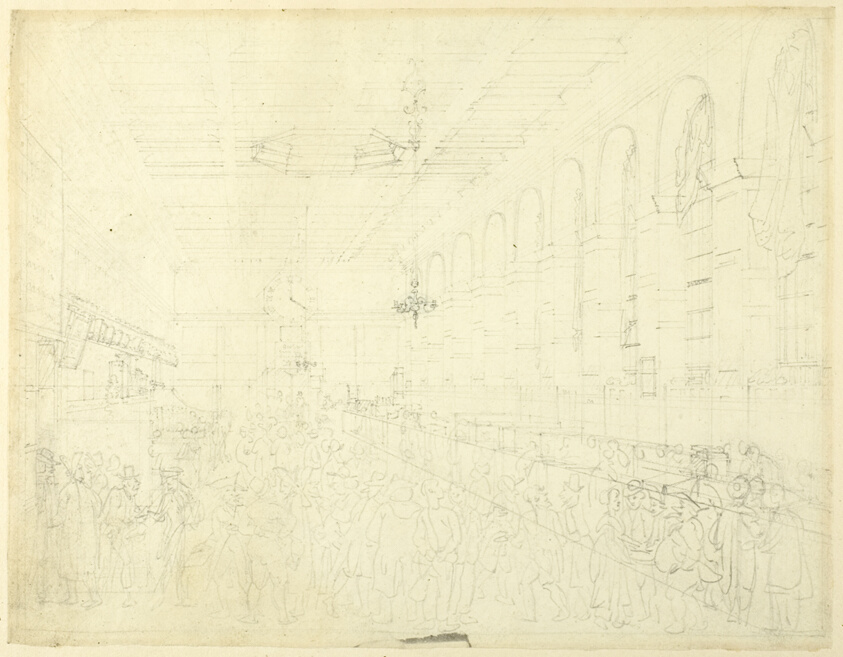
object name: Drawing and Watercolor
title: Study for The Long Room, Custom House, from Microcosm of London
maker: Augustus Charles Pugin (English, born France, 1762-1832); Thomas Rowlandson (English, 1756-1827)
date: c. 1808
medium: Graphite on ivory wove paper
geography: England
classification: graphite; drawings (visual works); prints and drawing